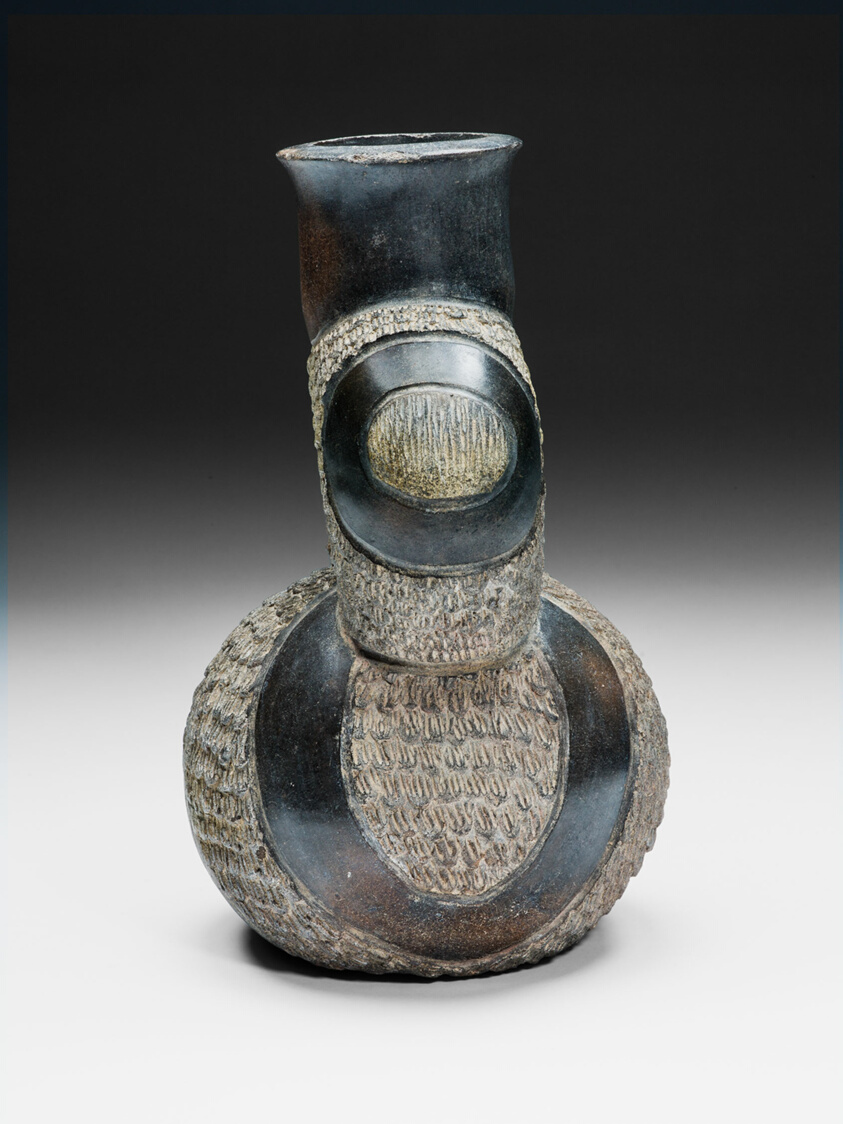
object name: Vessel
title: Stirrup Vessel with Textured Surface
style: chavín horizon, early horizon, Pre-Columbian, americas, andes, Arts of the Americas, andean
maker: Chavín (North coast, Peru)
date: c. 800 BCE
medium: Ceramic and pigment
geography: Peruvian North Coast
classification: earthenware; art of the americas; ceramics; vessel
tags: texture, geometric, servingware